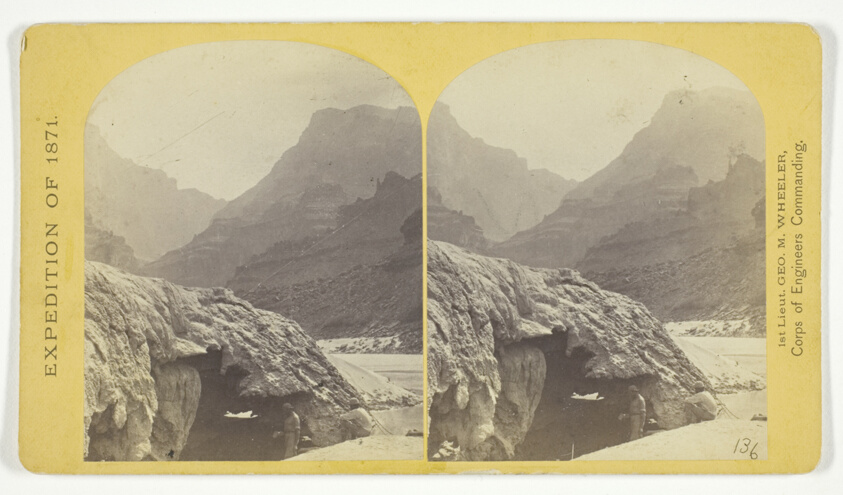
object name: Photograph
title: Grotto Spring, Grand Cañon, Colorado River, No. 4 from the series "Explorations and Surveys West of the 100th Meridian"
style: 19th century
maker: Timothy O'Sullivan (American, born Ireland, 1840–1882)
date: 1871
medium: Albumen print, stereo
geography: United States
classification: stereograph (albumen); albumen silver print; photographic process; photography; photograph